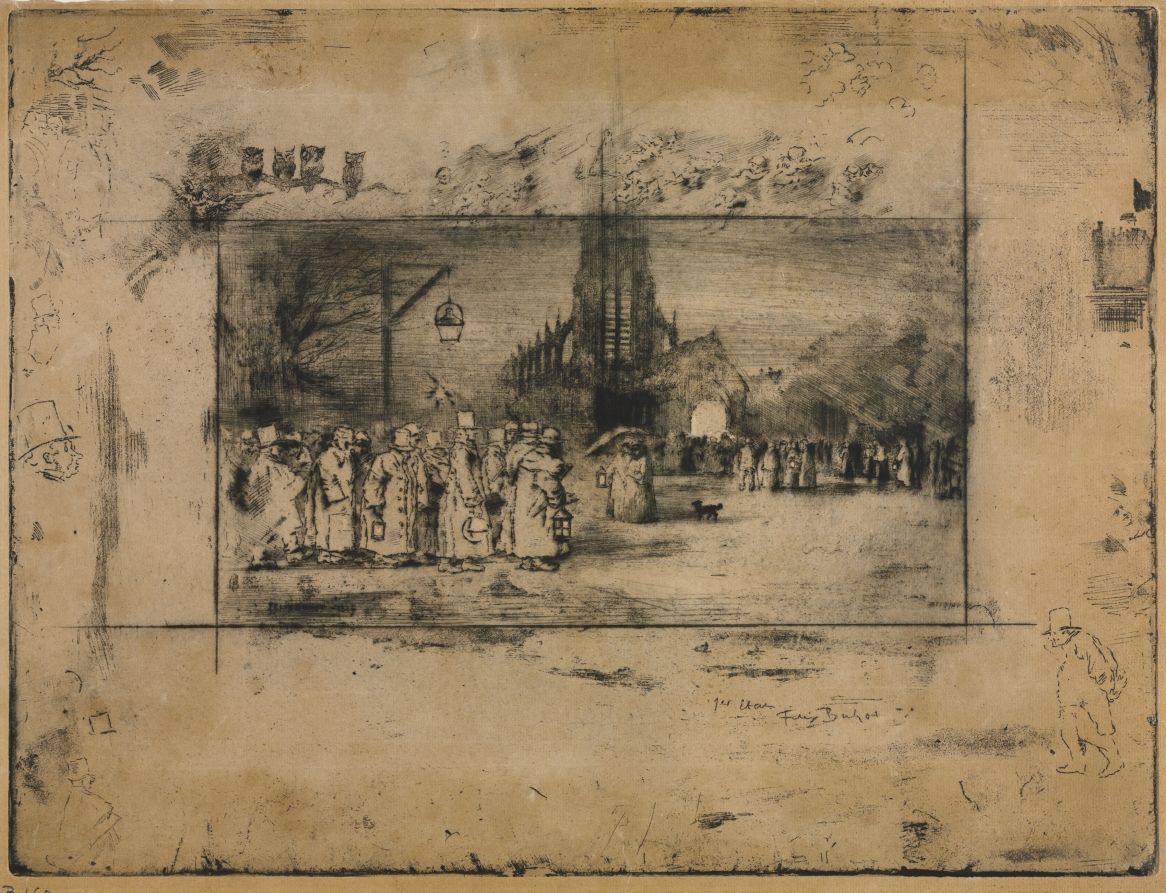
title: The Midnight Mass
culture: France, 19th century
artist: Félix Hilaire Buhot (French, 1847–1898)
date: 1887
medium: etching, drypoint, aquatint, and roulette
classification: Print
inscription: inscribed and signed, lower right, in graphite: 1er Etat Felix Buhot; signed and dated, lower left, in plate: Felix Buhot 1887